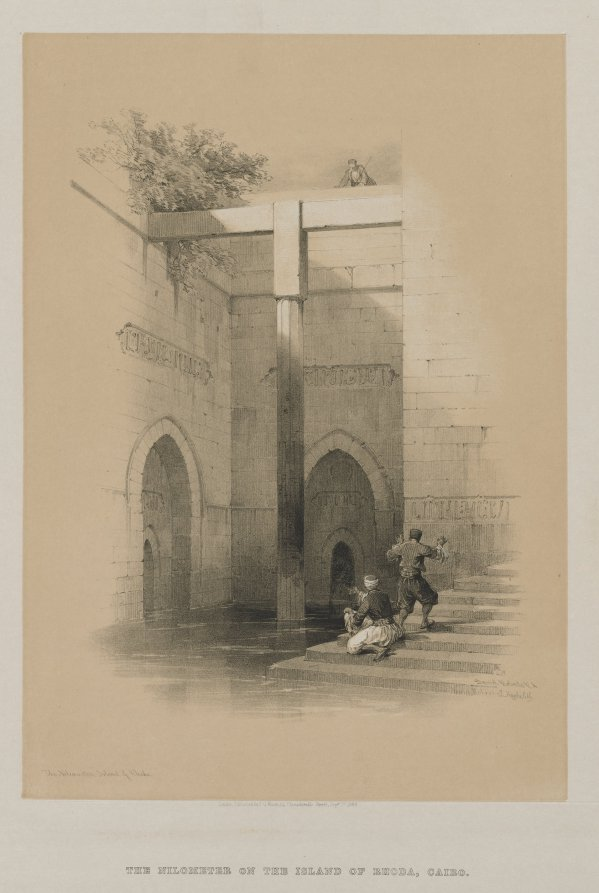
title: Egypt and Nubia, Volume III: The Nileometer. Island of Rhoda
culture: England, 19th century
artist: Louis Haghe (British, 1806–1885)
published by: F. G. Moon, 20 Threadneedle Street, London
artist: after David Roberts (Scottish, 1796–1864)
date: 1849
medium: color lithograph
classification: Print